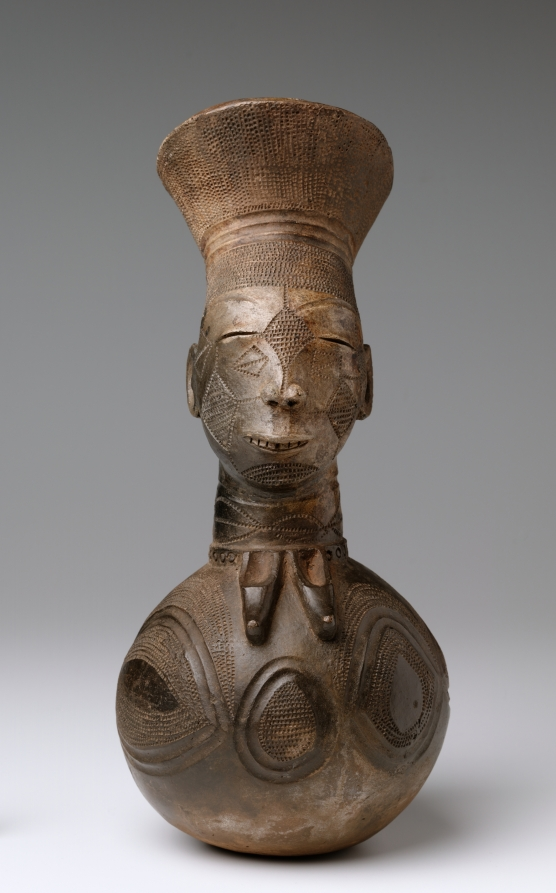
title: Vessel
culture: Central Africa, Democratic Republic of the Congo, Mangbetu, early 20th century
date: early 1900s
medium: terracotta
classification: Vessels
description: Women were and still are responsible for the making of terracotta pots among the Mangbetu. It seems, however, that men added the figurative elements that embellish examples like the one shown here. The depicted head with its elongated skull and halolike coiffure imitates the cranial deformation and hairstyle fashionable among female Mangbetu royalty at the beginning of the 20th century. Typically used for wine, many vessels were also explicitly made for sale to foreigners.